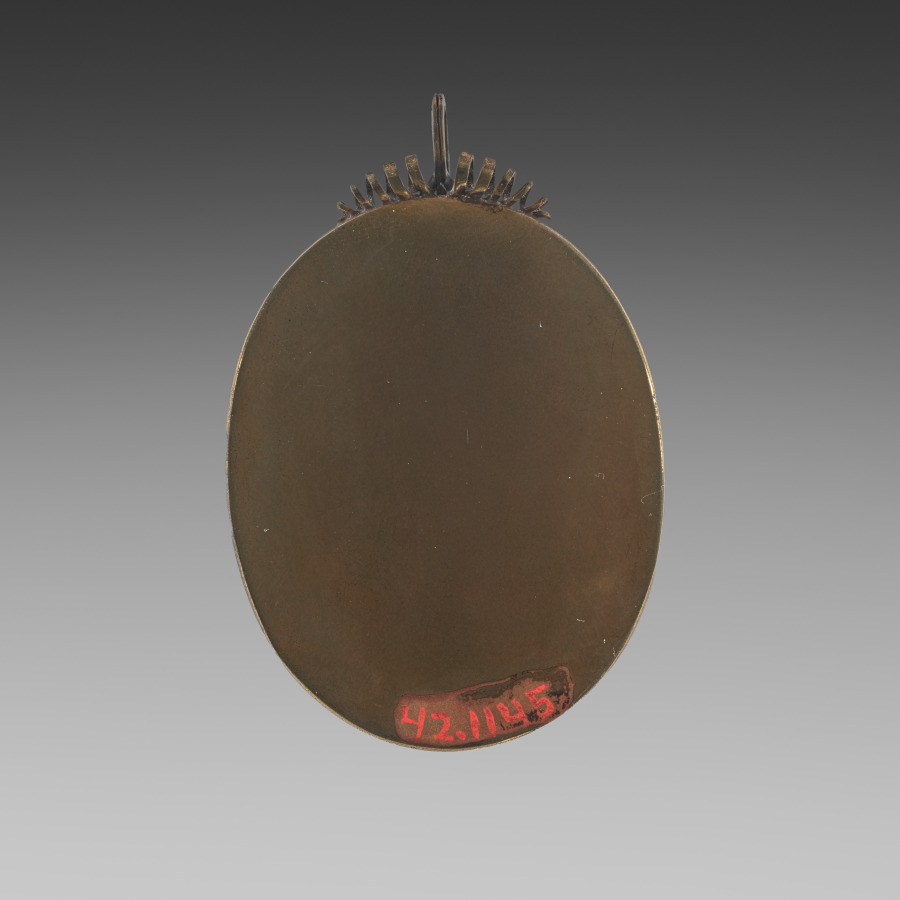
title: Portrait of Frederick V, Elector Palatine, King of Bohemia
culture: England, 17th century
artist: John Hoskins (British, c. 1590–1665)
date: 1630s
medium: watercolor on vellum in a silver gilt frame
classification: Portrait Miniature